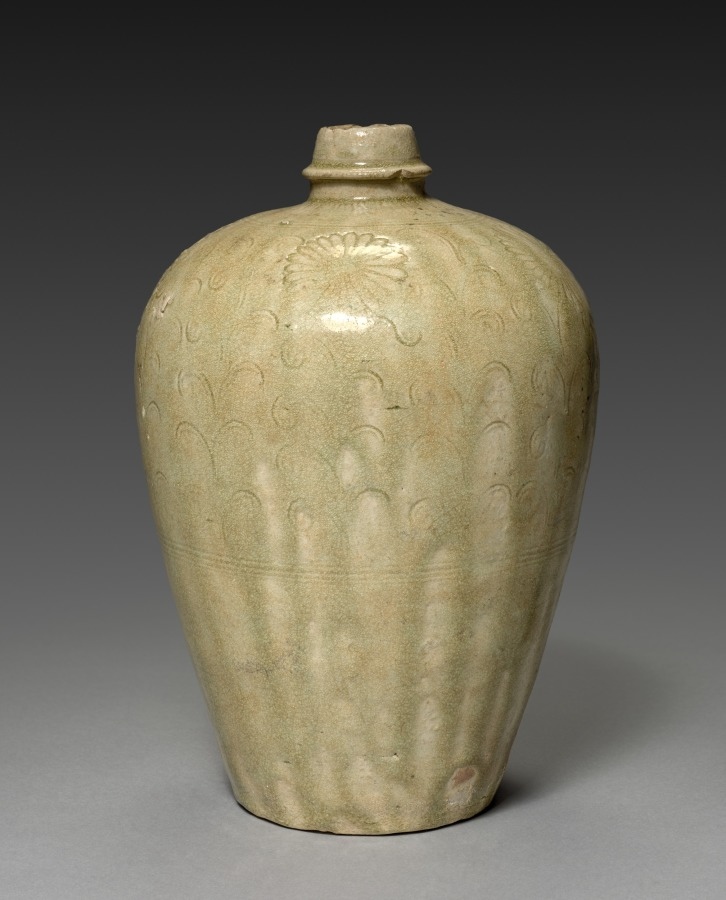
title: Wine Flask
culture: Japan, Kamakura period (1185–1333)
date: c. 1300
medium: Stoneware with ash glaze and underglaze stamped and incised decoration (Seto ware)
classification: Ceramic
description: This wine flask (heishi) was produced in Seto, in present-day Aichi prefecture near the city of Nagoya. Seto ware was made in imitation of Chinese Song dynasty prototypes, and was unique among Japanese ceramics for being glazed at the initial time of its production in the late 1200s. Such wares were later prized for display in tea practice.